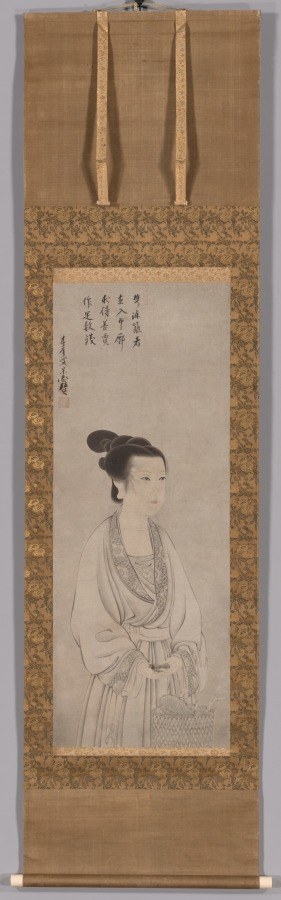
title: Rei Shōjo (Ling Zhaonu)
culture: Japan, Muromachi period (1392–1573)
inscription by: Shunoku Sōen (Japanese, 1529–1611)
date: 1500s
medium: hanging scroll, ink and light color on paper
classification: Painting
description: Legend has it that Chinese beauty Ling Zhaonu, whose name is pronounced Rei Shōjo in Japanese, was a model of devotion to her parents. She put great effort into selling baskets made by her elderly father, a devout Buddhist, thereby keeping the family afloat financially. The verse on the painting relates her story, and was inscribed by a Zen monk.